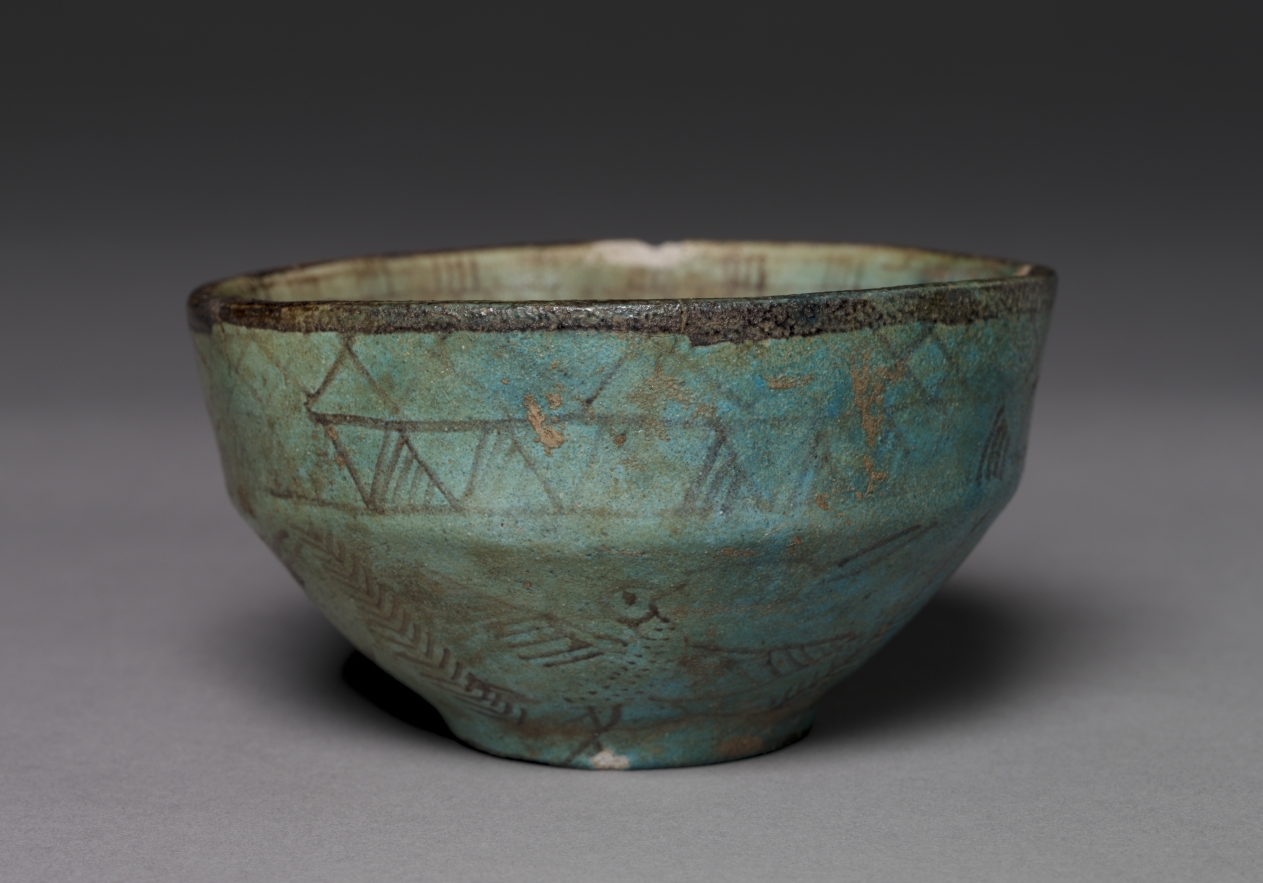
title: Decorated Bowl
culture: Egypt, Middle Kingdom (2040–1648 BCE)–New Kingdom (1540–1069 BCE)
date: 1980–1801 BCE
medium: turquoise faience with black painted decoration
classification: Vessels